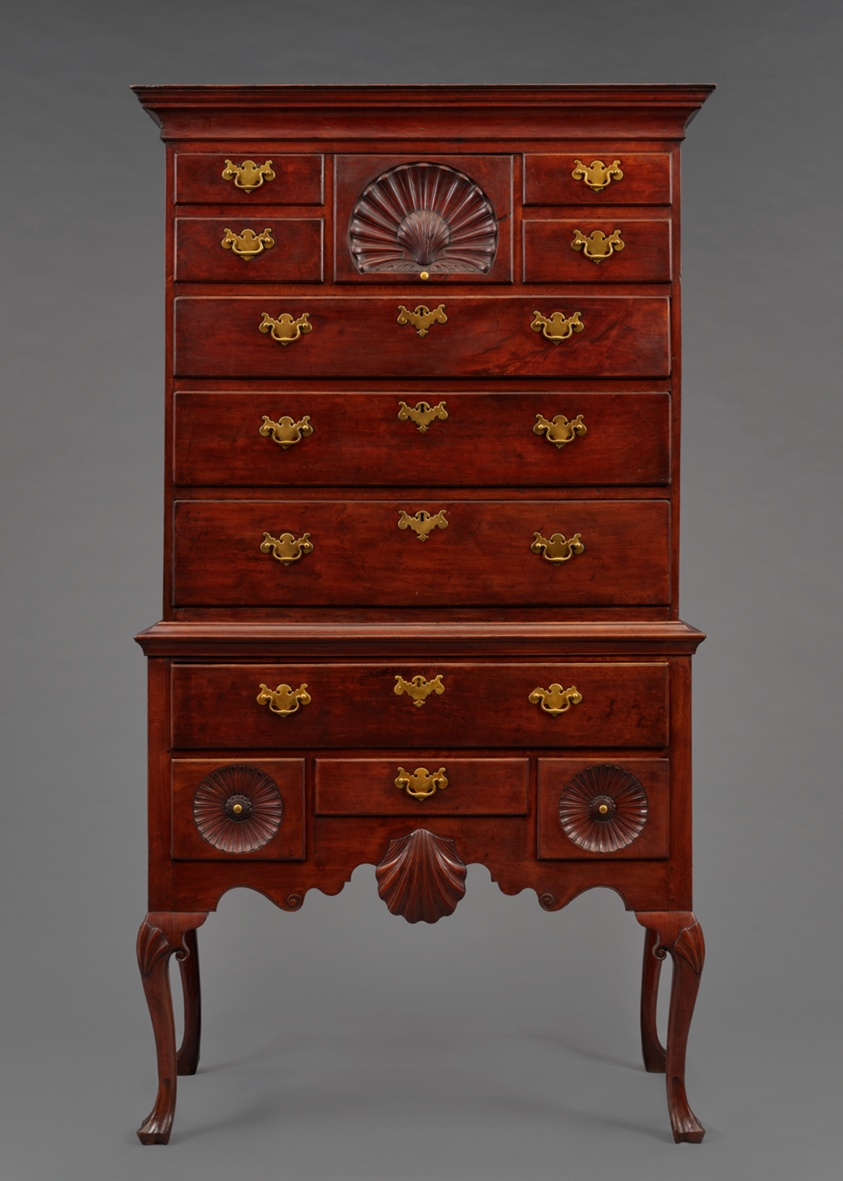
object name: Furniture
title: High Chest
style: queen anne, 18th Century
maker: Artist unknown (American, 18th century); Pennsylvania or New Jersey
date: 1740–60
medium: Cherry and brass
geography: United States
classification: american decorative arts; american arts; furniture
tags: clam shell, scalloping